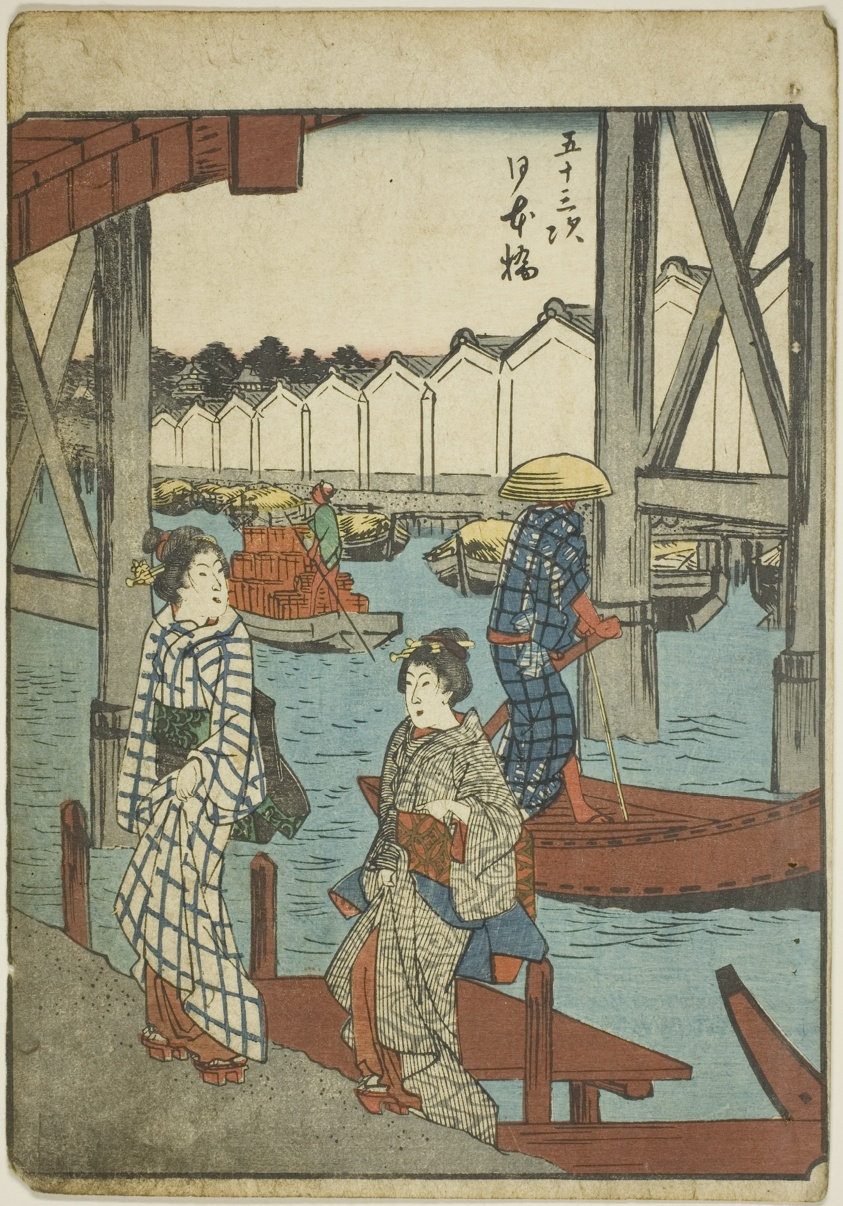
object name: Print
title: Nihon Bridge (Nihonbashi), from the series "Fifty-three Stations [of the Tokaido] (Gojusan tsugi)," also known as the Figure Tokaido (Jinbutsu Tokaido)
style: Japanese (culture or style)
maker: Utagawa Hiroshige 歌川 広重; Japanese, 1797-1858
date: 1852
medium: Color woodblock print; chuban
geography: Japan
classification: woodblock print; print